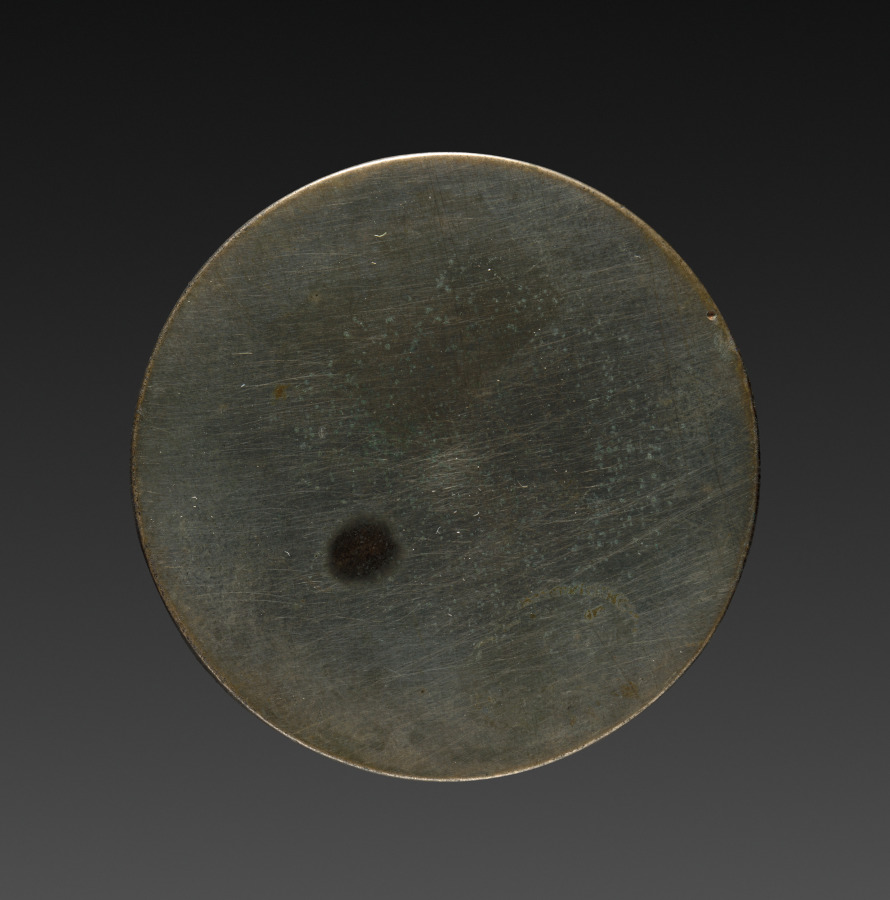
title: Mirror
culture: Japan, Edo period (1615–1868)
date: 1615–1868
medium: bronze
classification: Metalwork